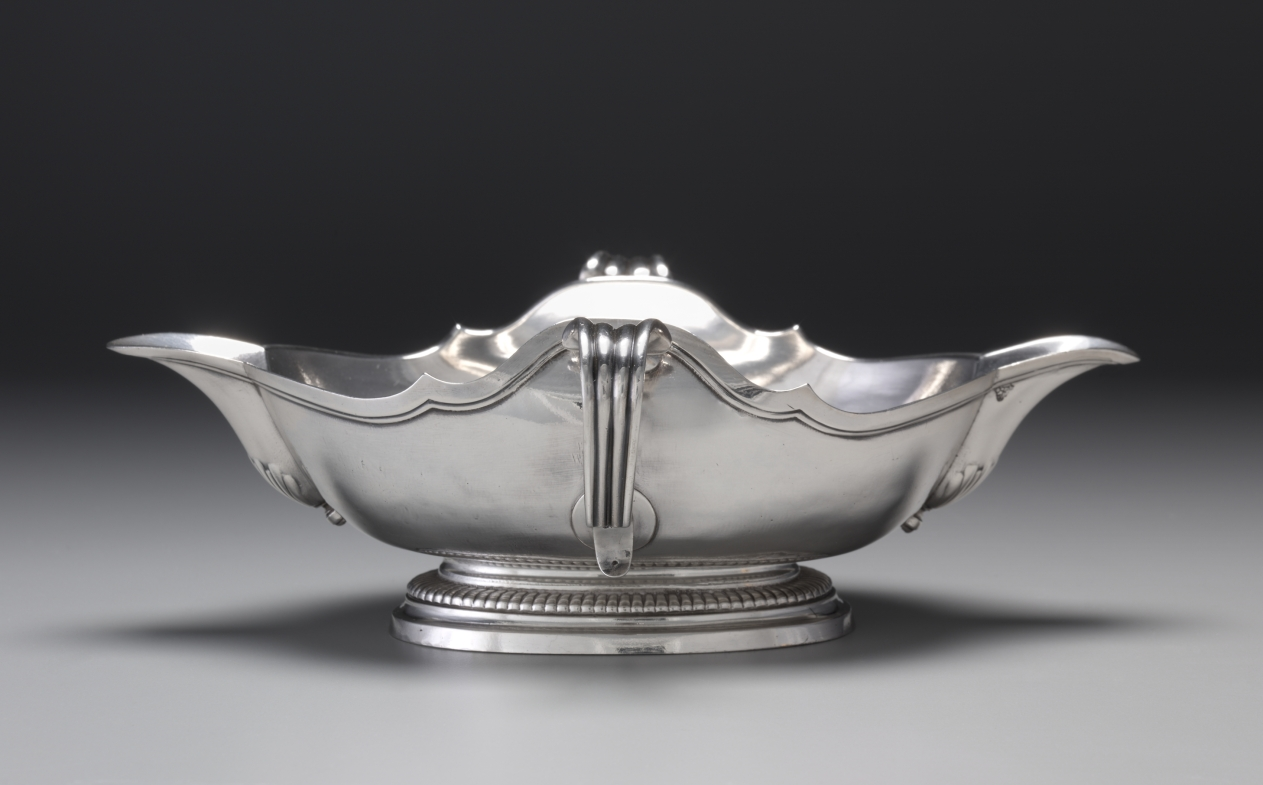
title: Sauce Boat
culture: France, Paris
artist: Nicolas Duclos (1699–1755), master silversmith in 1726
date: 1743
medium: silver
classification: Silver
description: When heated sauces began to be served separately from meat and fish towards the end of the 17th century, sauce boats began to be used as another piece of elaborately designed silver dinner services popular in European courts. This sauce boat reflects early models in the shape of a nef, a condiment vessel which derives its name from a ship of the same shape.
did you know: This sauceboat would likely have been accompanied by a tray and a spoon used to skim grease from the surface of the sauce.